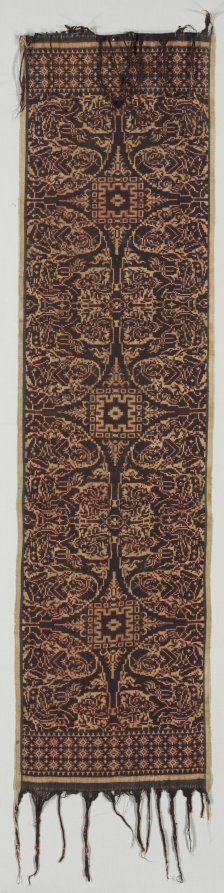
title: Ceremonial Cloth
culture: Indonesia, Bali, Tengann Pageringsingan, early 20th century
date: early 1900s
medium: double ikat, tabby weave; cotton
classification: Textile